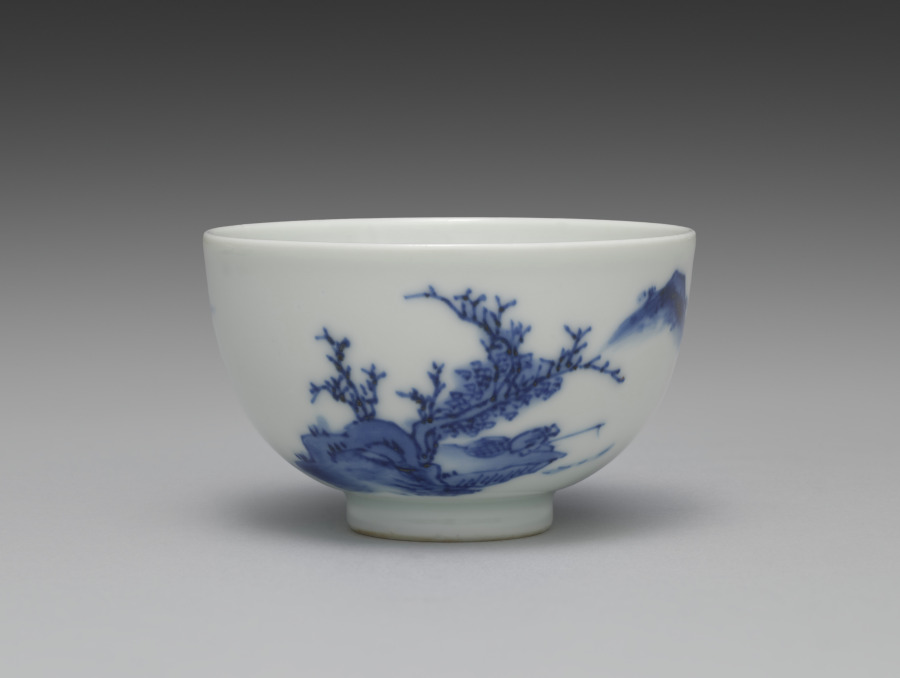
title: Teacup from Tea Set with Chinese Landscape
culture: Japan, Meiji period (1868–1912)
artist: Seifū Yohei III (Japanese, 1851–1914)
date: 1893–1914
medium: Porcelain with underglaze blue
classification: Ceramic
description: The theme of this sencha tea set is the Chinese scholar-recluse in an idyllic landscape. Each of the five teacups has a landscape with an architectural structure and some human activity. This tea set has a side-handled pot called a kyūsu, used for steeping, straining, and serving tea. Unlike some others, this set also has a yuzamashi, a container used to cool boiled water to just the right temperature for the best flavor when steeping. Seifū Yohei III’s painting teacher, Tanomura Chokunyū (1814–1907), made a visual record of famous sencha events that shows how these kinds of porcelains fit with objects such as a stove and kettle to form a complete set of utensils for tea preparation, and with ensembles of decorative objects meant to inspire creativity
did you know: This cup has a man walking toward a group of three pavilions announced with a banner hanging from a tall post; beyond this are two large deciduous trees sheltering a stand of small conifers. Across the water from this site is another man sitting on the bank fishing with a large woven basket for his catch beside him.